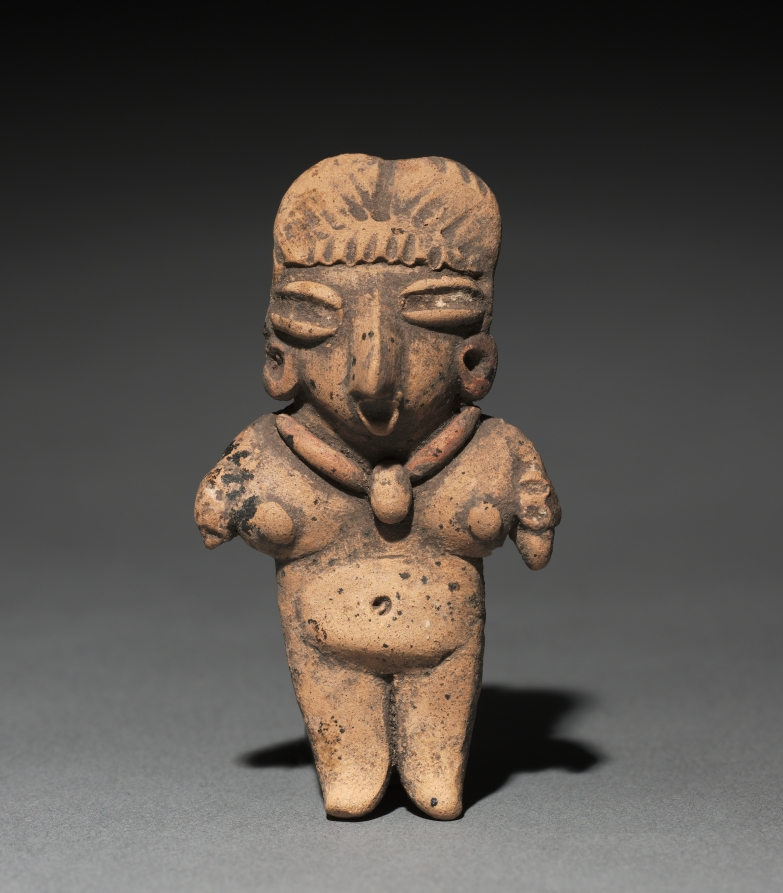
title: Female Figurine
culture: Mexico, Chupíuaro, Guanajuato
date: 400–100 BCE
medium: pottery with traces of white pigment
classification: Sculpture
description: The Chupícuaro culture, located north of Mexico City in the state of Guanajuato, created a distinctive ceramic tradition including small clay figurines. This example is said to belong to a group of ten figurines from the same burial or cache (1990.145–154). The group includes both males and females that can be sorted into couples based on size.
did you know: Groups of figurines were sometimes arranged in scenes and likely used in household rituals.